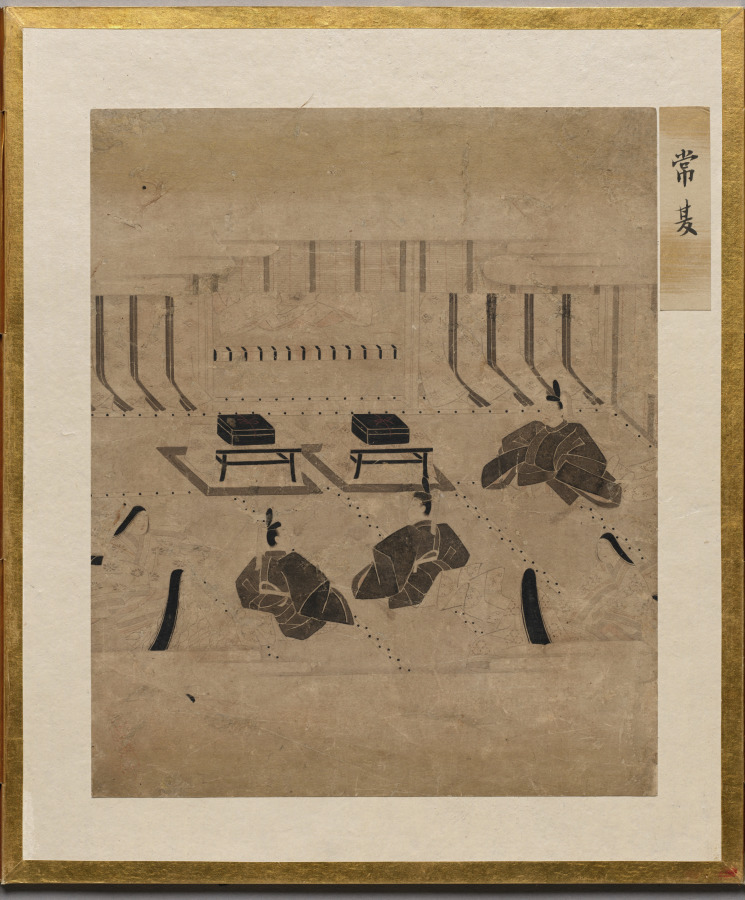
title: Wild Carnation from Album of Illustrations for the Tale of Genji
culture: Japan, Edo period (1615–1868)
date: 1600s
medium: painting in an accordion-style album; ink, light color, and gold on paper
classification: Bound Volume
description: This album contains illustrations for the classic literary work the Tale of Genji, authored in the 1000s by Murasaki Shikibu, an aristocrat of the Heian period (794–1185) court. The scenes are painted in the “white drawing” (hakubyō) mode, in which a fine ink line is used to depict figures and spaces with great subtlety, punctuated only occasionally by traces of red pigment for a character’s lips, a detail of a garment, or a decorative element. These two scenes illustrate episodes from the chapters “Thin Veil of Cloud” (Usugumo) and “Barrier Gate” (Sekiya).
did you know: The illustrations are identified by chapter title in cartouches to the upper right of the paintings.